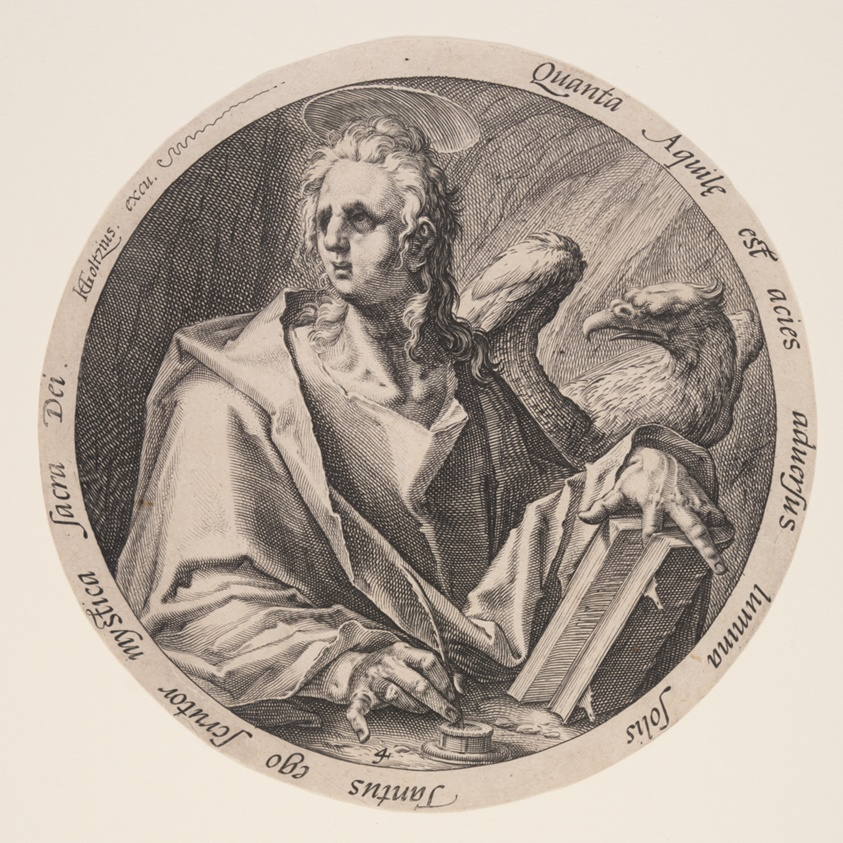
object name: Print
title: John, from The Evangelists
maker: Jacques de Gheyn II (Dutch, 1565–1629); after Hendrick Goltzius (Dutch, 1558–1617)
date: 1588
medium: Engraving on laid paper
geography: Netherlands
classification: engraving; paper; print; prints and drawing